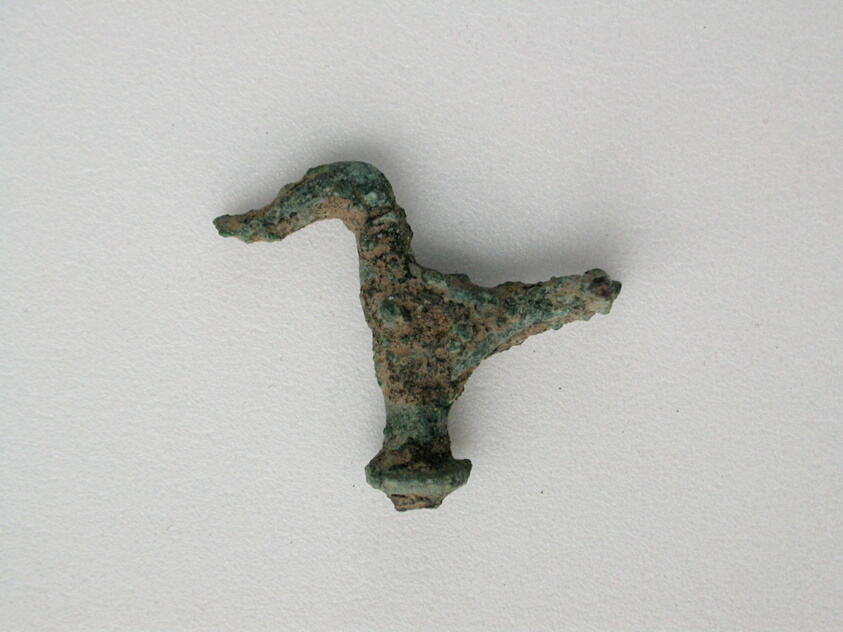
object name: Decorative Arts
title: Bird Fragment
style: geometric, ancient, greek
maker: Greek; Thessaly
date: Geometric Period (800–600 BCE)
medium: Bronze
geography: Greece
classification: votive offering; ex-voto; decorative arts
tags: bird